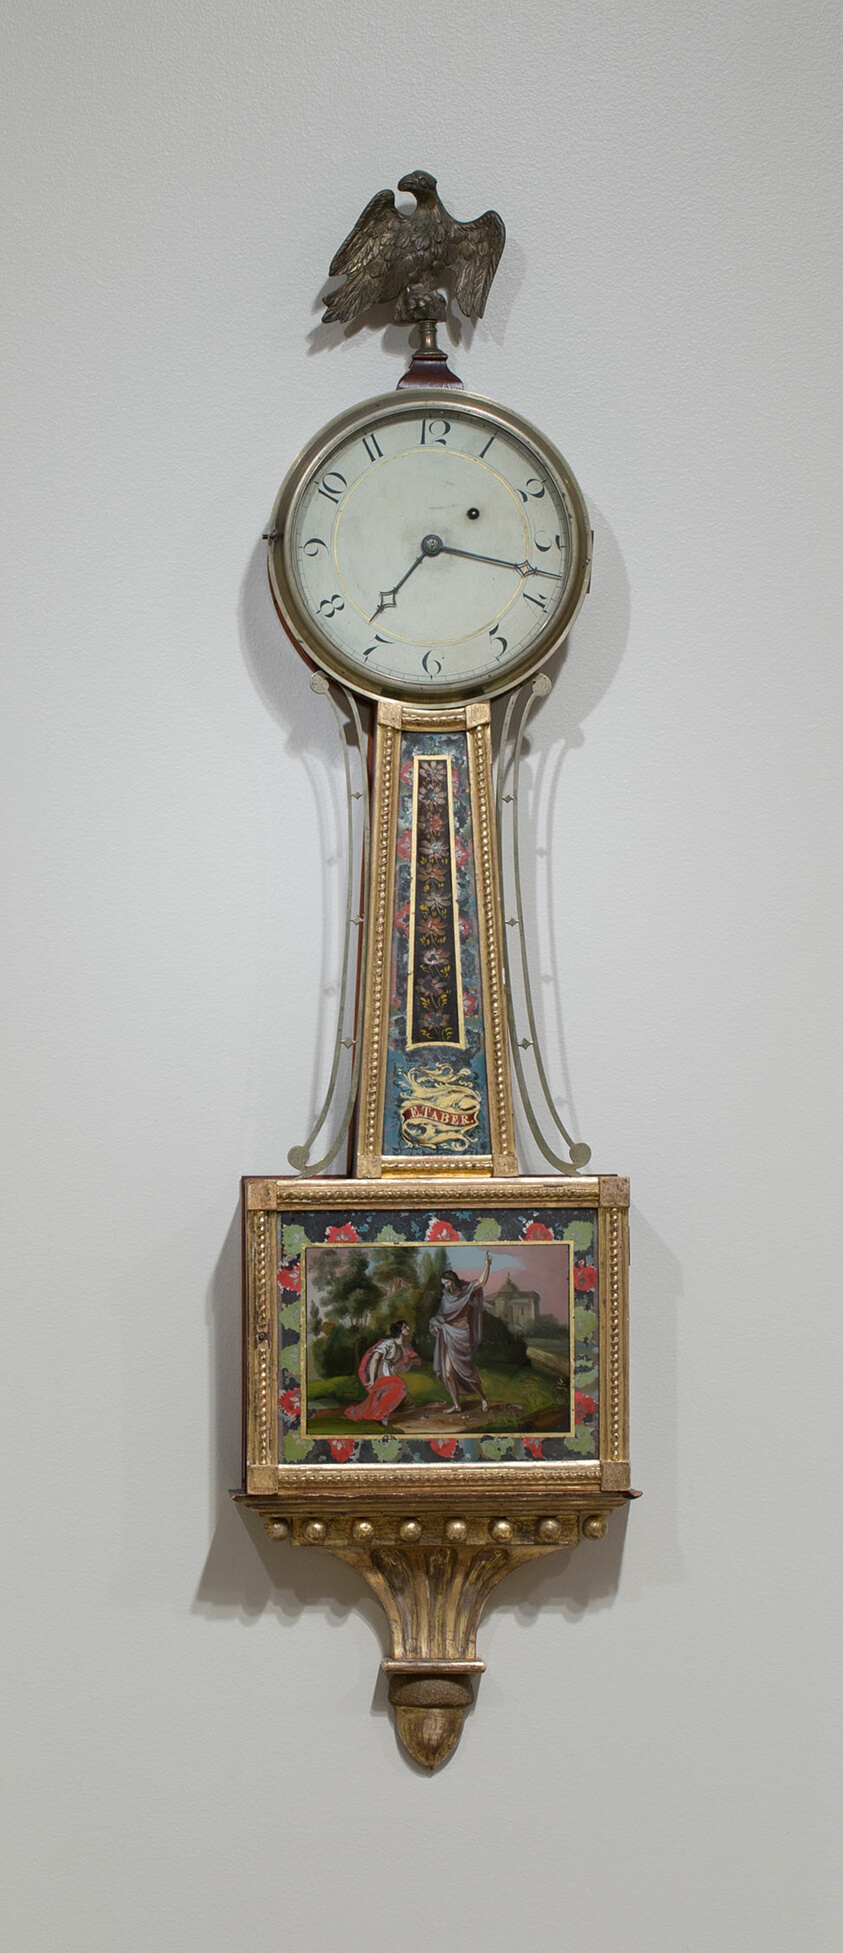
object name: Furnishings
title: Timepiece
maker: Works by Elnathan Taber (American, 1768–1854); Roxbury, Massachusetts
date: 1802–5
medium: Gilt mahogany and white pine, painted glass, gesso, iron, steel, and brass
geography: Roxbury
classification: furniture accessory; american decorative arts; american arts; decorative arts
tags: clocks, banjo clock, eagles, temple, timepiece